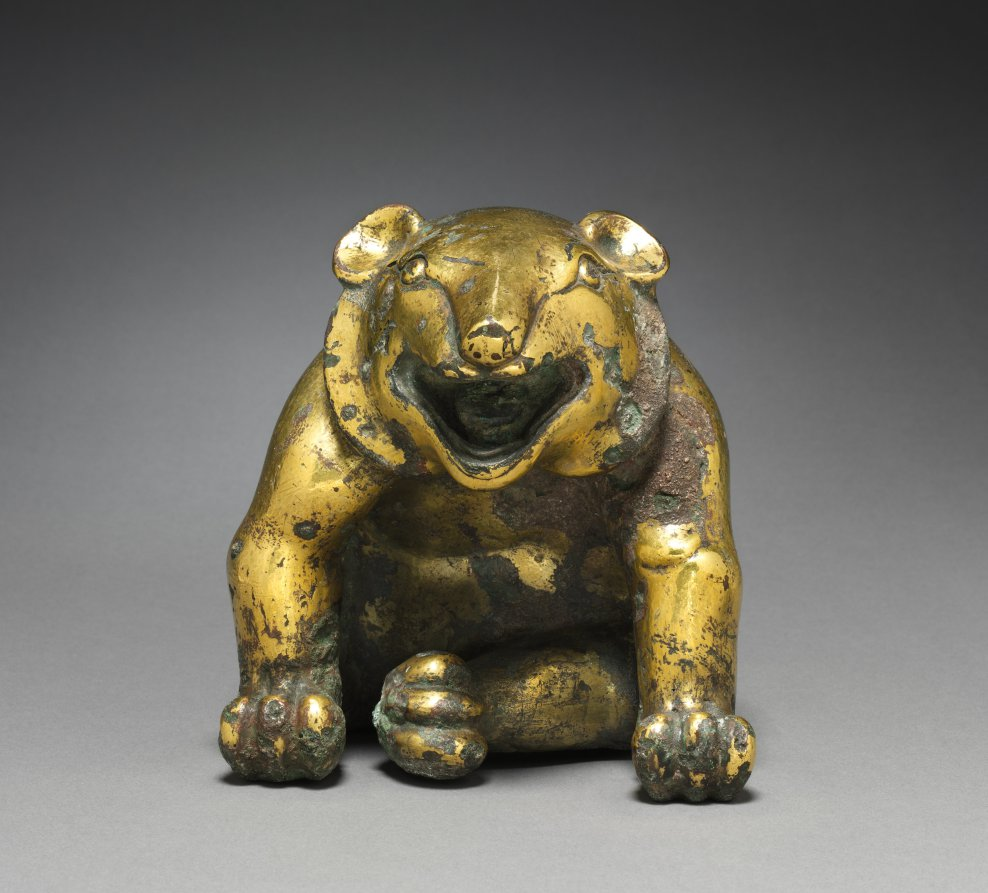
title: Mat Weight in the Form of a Bear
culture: China, Western Han dynasty (206 BCE–8 CE)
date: 202 BCE–9 CE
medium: gilt bronze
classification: Sculpture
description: The bear imagery was particularly popular during the Han dynasty and was a metaphor of heroic power. This heavy, solid bear was probably used as a mat weight; other small squatting bears often served as the legs of vessels.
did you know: Bear imagery, which symbolized heroic power, was particularly popular during the Han dynasty.